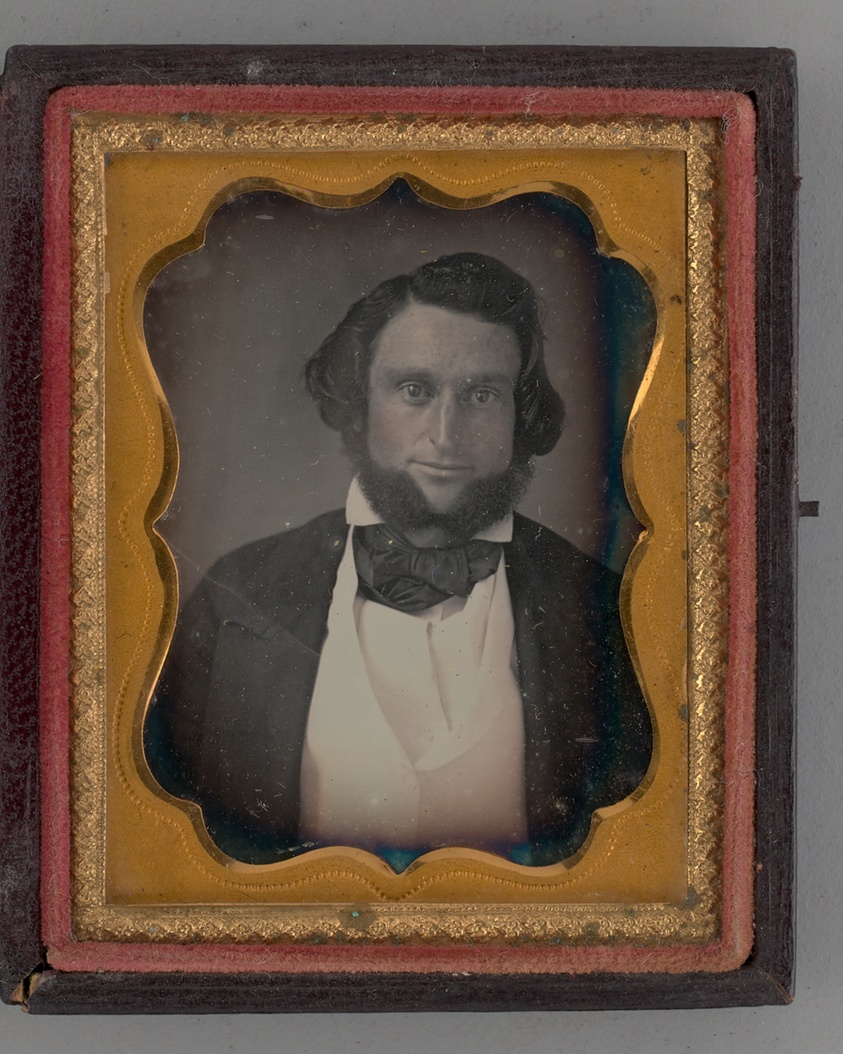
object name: Photograph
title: Untitled (Portrait of a Man)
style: 19th century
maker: Unknown maker; American, 19th century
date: 1856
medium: Daguerreotype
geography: United States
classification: portrait; photograph; photographic process; photography; portrait; daguerreotype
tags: lundberg collection, photography, portraits, portraits: male subject, Male